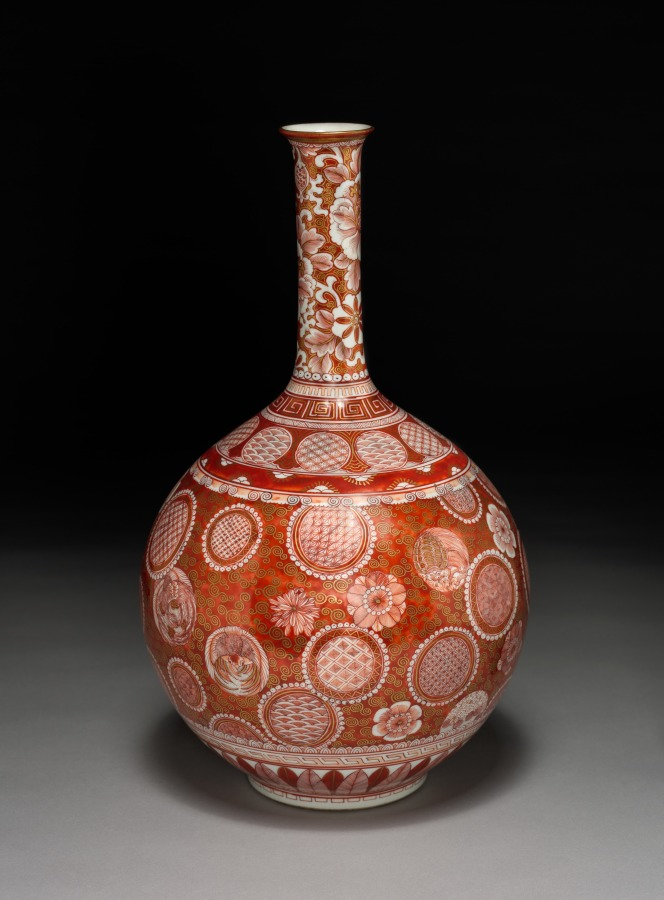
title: Vase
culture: Japan, Edo period (1615–1868)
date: early to mid-1800s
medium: porcelain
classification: Ceramic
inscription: on the base in red are "FUKU" (happiness) in a square and "ICHI-KA" in a fish.